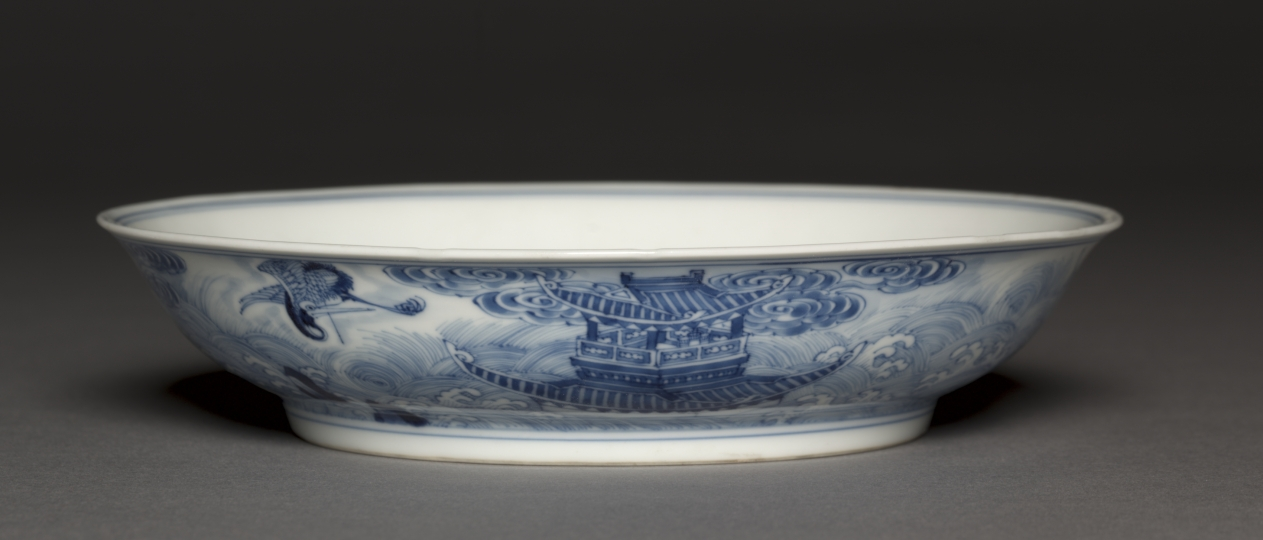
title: Dish with Laozi Riding a Water Buffalo (interior); Pavilion and Immortals in Rocky Landscape (exterior)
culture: China, Jiangxi province, Jingdezhen kilns, Qing dynasty (1644-1911), Yongzheng reign (1723-35)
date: 1723–35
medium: porcelain with underglaze blue decoration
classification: Ceramic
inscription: 大明成化年製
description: Daoism traces its origins to Laozi, a sage believed to have lived in the sixth century BC, who was the reputed author of the Daode jing (Classic of the Way), a fundamental text for Daoism. The interior of this dish depicts the elderly Laozi riding a buffalo. He is accompanied by three servants and is greeted by a scholarlike figure. This dish borrows brush and shading techniques typically employed by artists who paint on paper or silk, a development frequently seen in porcelain decoration around the 1700s.